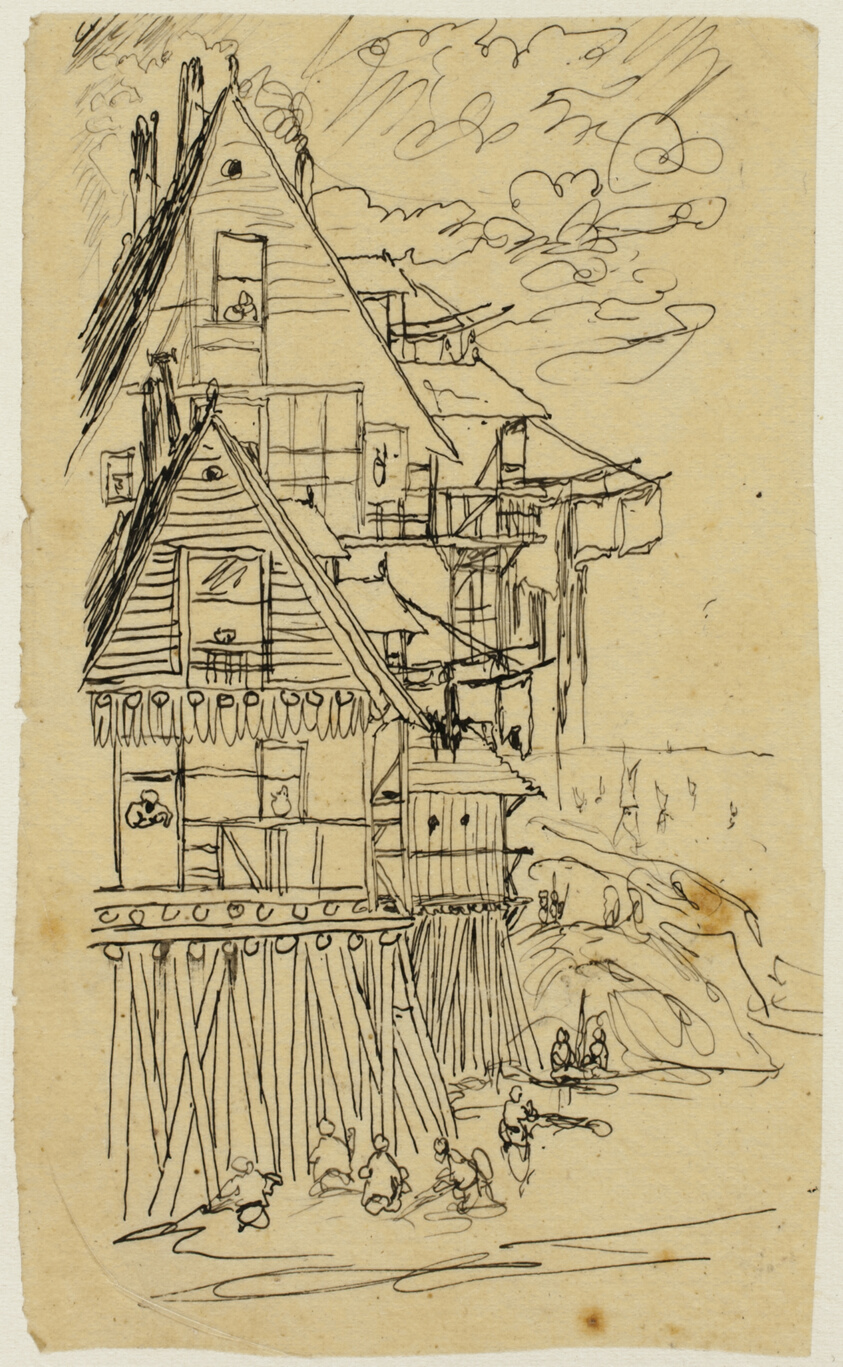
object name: Drawing and Watercolor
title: The Edge of the Shore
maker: Rodolphe Bresdin (French, 1825-1885)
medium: Pen and black ink, on tan tracing paper, laid down on ivory wove paper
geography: France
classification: pen and ink drawings; drawings (visual works); prints and drawing